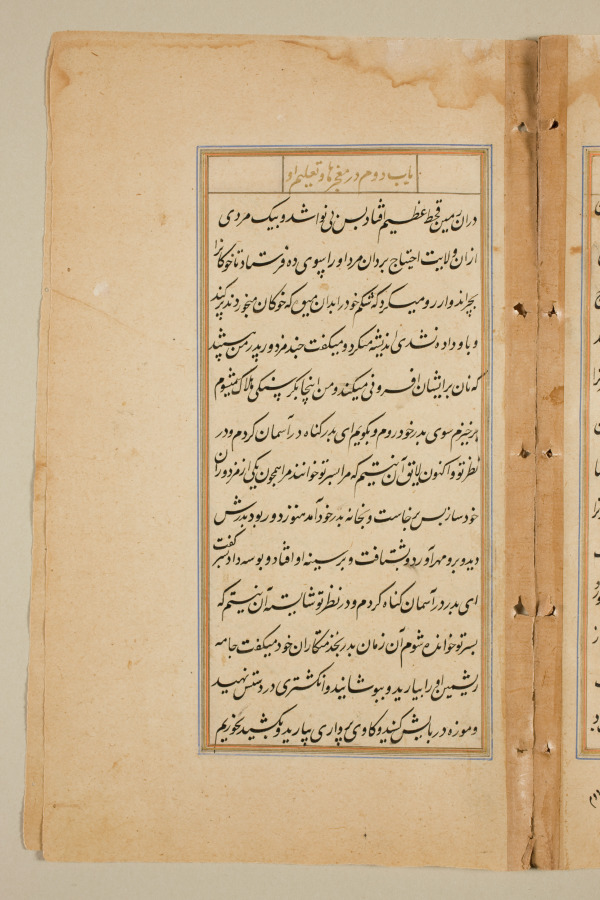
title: Text page from a Mirror of Holiness (Mir’at al-quds) of Father Jerome Xavier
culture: Mughal India, Allahabad, made for Prince Salim (1569–1627)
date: 1602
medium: Ink and gold on paper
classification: Manuscript